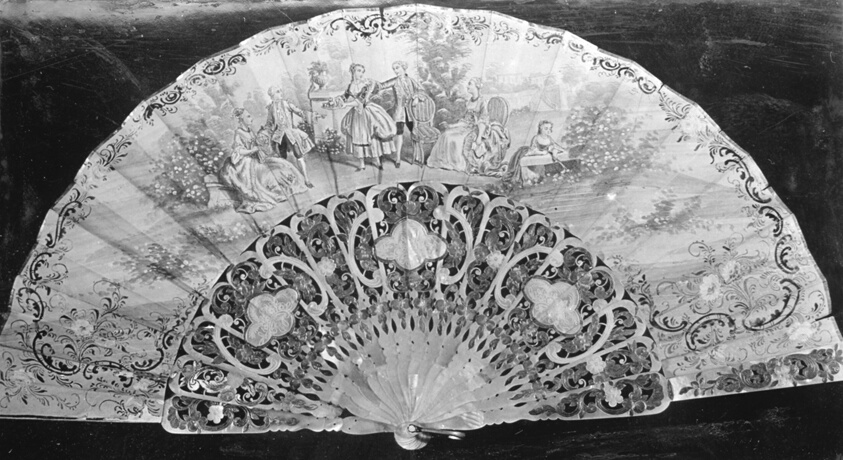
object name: Costume and Accessories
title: Fan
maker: France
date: 1825/75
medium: Pierced and carved pearl sticks and guards. Painted paper mount; opolescent; gilt loop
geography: France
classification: textile; fan - paper; costume accessory - folding fan; costume accessory; costume